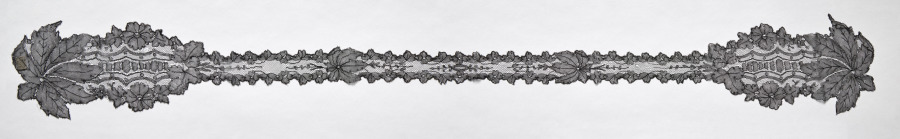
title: Lace Lappet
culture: France, Chantilly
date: 1800s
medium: Silk: bobbin lace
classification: Lace